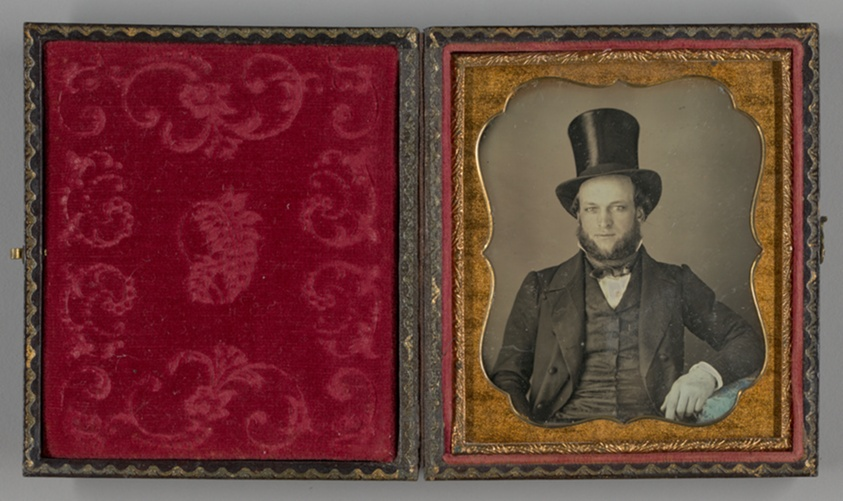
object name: Photograph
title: Untitled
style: 19th century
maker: Artist unknown; American, 19th century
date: 1839/60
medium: Daguerreotype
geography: United States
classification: daguerreotype; photographic process; photography; photograph